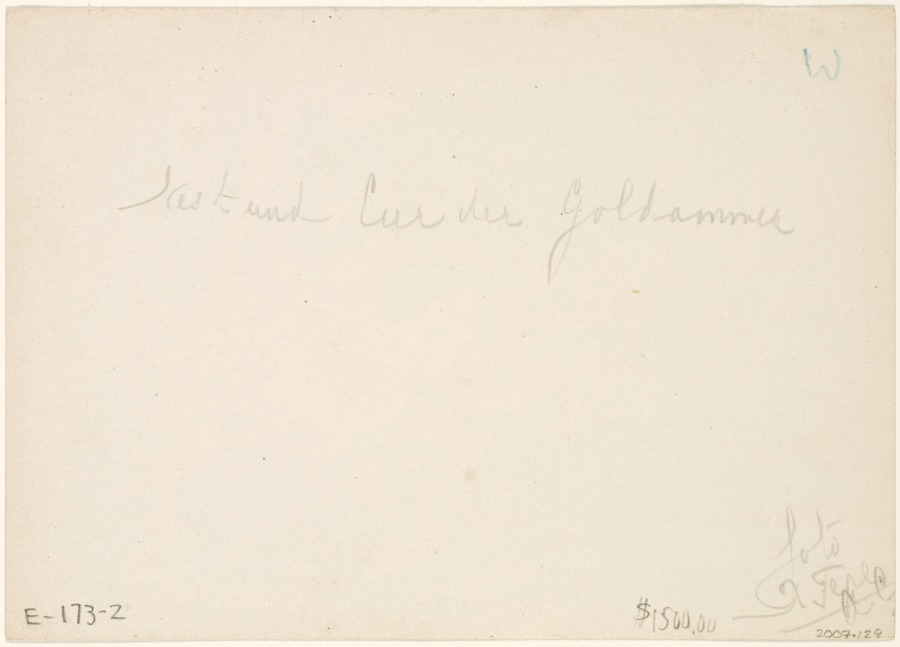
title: Yellowhammer Nest with Eggs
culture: Netherlands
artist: Richard Tepe (Netherlandish, 1864–1952)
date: 1900s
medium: gelatin silver print on printing-out paper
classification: Photograph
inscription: Written in pencil on verso: "Nest and Curder Goldammes" Written in pencil on verso: "Foto/R. Tepe (signed)"